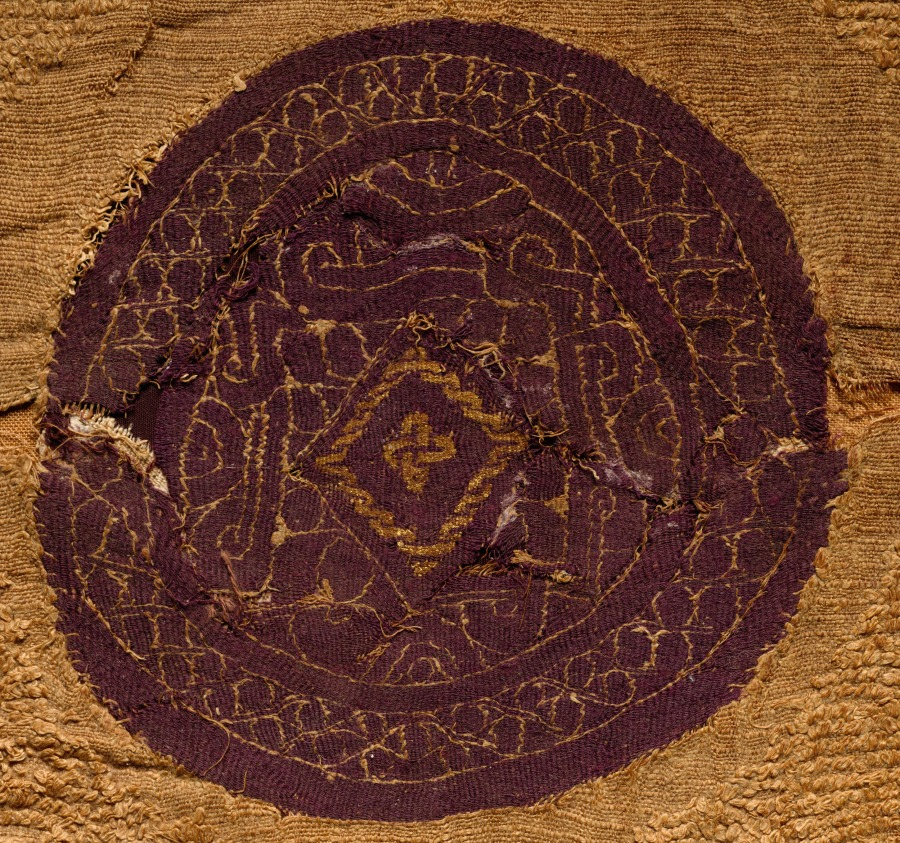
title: Fragment with Gold Foil, from a Furnishing Fabric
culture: Egypt, Byzantine period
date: 300s–400s CE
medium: undyed linen, dyed wool, and gold foil; plain weave with supplementary weft-loops, slit-tapestry weave with supplementary weft wrapping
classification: Textile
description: The rare gold foil and rich purple wool in these two fragments originally enriched a luxurious fabric. Costly gold foil wrapped around a silk core forms the central motif within a diamond, woven in tapestry weave. The surrounding interlacing knot design—achieved with three overlapping squares (in the small fragment) or interlacing squares (in the large fragment)—offered protection from danger and harm. The roundels were woven with extra, or supplementary, linen wefts wrapped on the purple ground. Linen pile loops in the ground fabric resisted abrasion in furnishing fabrics and provided insulation in tunics.